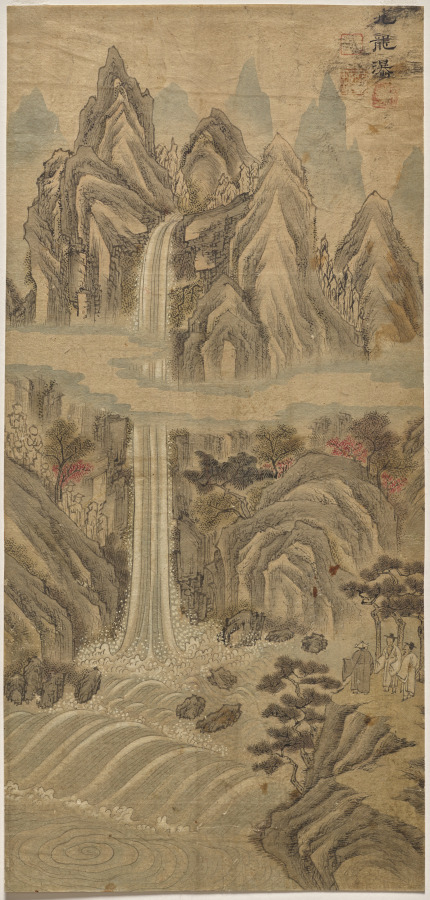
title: Nine-Dragon Falls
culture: Korea, Joseon dynasty (1392–1910)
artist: Han Unpyeong (Korean)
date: late 1800s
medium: ink and color on paper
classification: Painting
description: The Nine-Dragon Falls 구룡포 is one of the popular tourist sites at the Diamond Mountain 금강산 in North Korea. Its V-shaped valley that opens into a rushing white waterfall is its major attraction, allowing visitors to experience the powerful forces of nature. In this painting, two excited scholar tourists accompanied by a Buddhist monk are enjoying both the spectacle and the roar generated by the cascading waterfall.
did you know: The Nine-Dragon Falls, the main subject of this painting, is about 240 feet (74 meters) high.